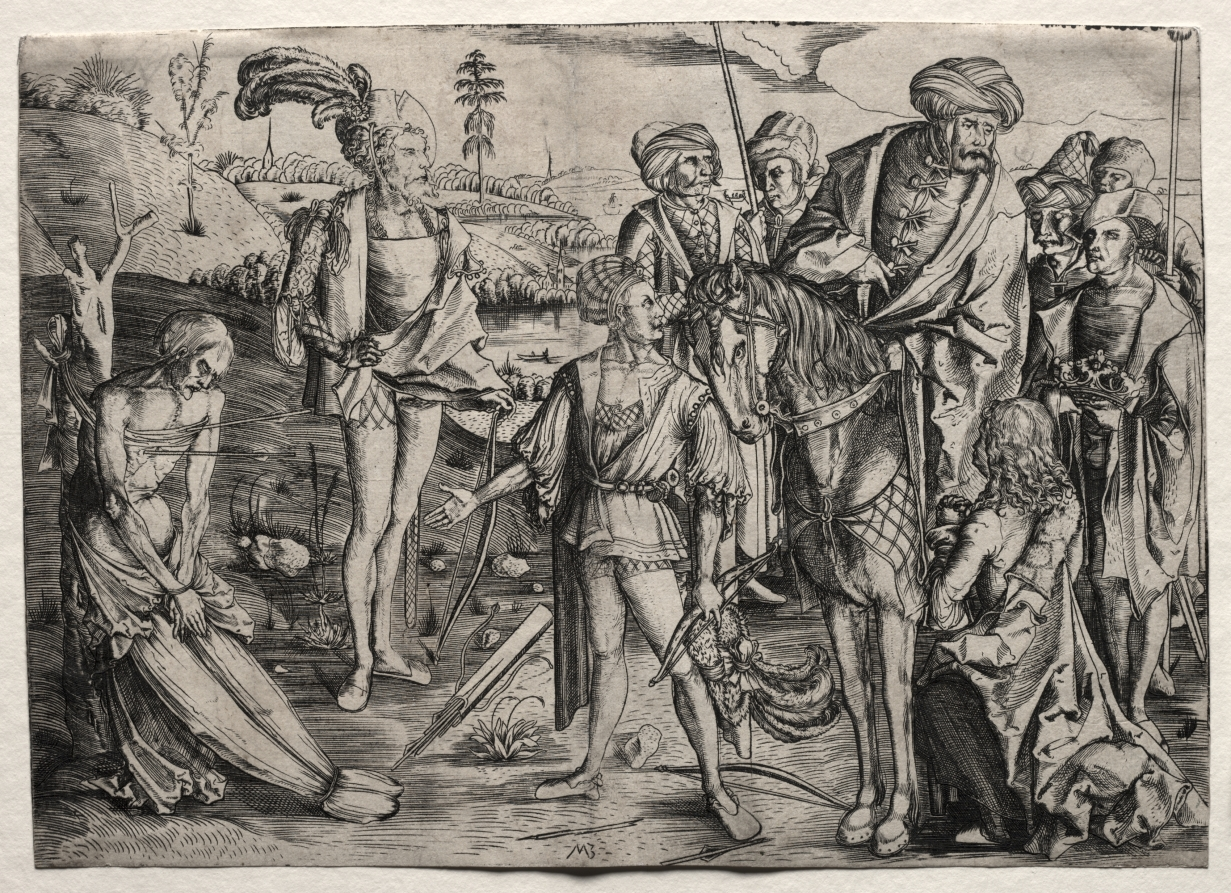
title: The Story of the Dead King and his Three Sons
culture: Germany, early 16th Century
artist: Master MZ (German)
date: 1500–03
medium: engraving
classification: Print